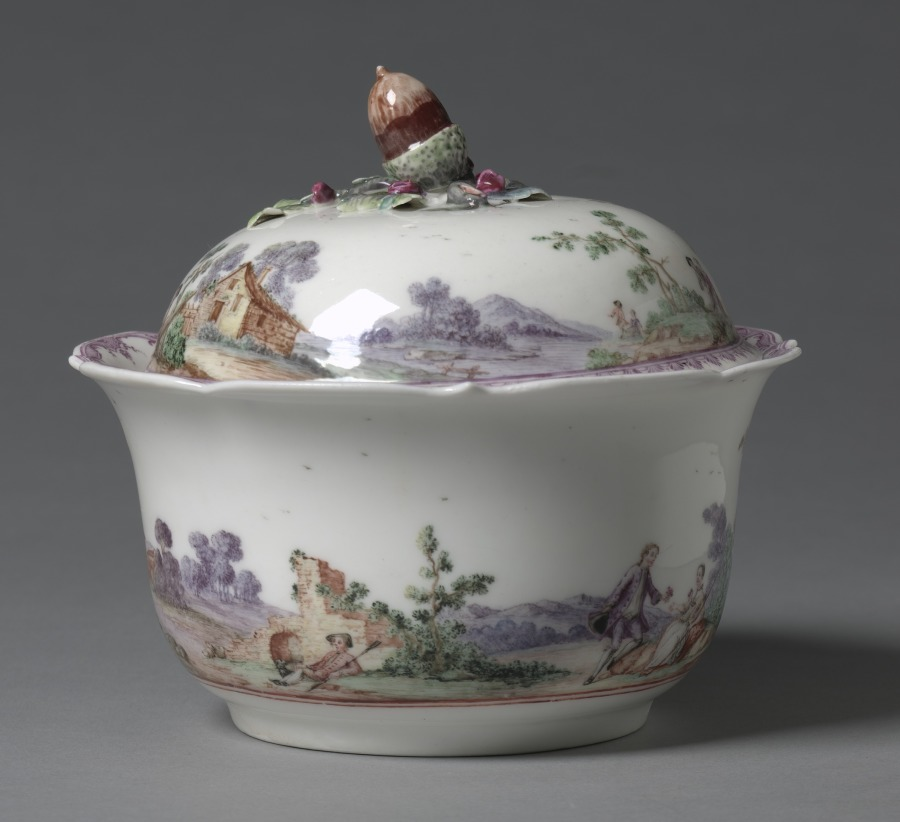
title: Covered Sugar Bowl (Pot à sucre)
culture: France, Vincennes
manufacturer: Vincennes Porcelain Manufactory (French, 1740–1756)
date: 1745–48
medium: soft-paste porcelain with enamel decoration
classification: Ceramic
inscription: In red on bottom of bowl: P.M. In red on interior of lid: P.M. 16 4.8B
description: This covered bowl, likely intended for sugar, is one of the earliest surviving examples of Vincennes porcelain, a reputed French factory moved to Sèvres in 1756. The continuous landscape is painted on this object en pointillé, a method by which a painter forms images with tiny dots. This style may have been influenced by their German competitors at the Meissen Porcelain Factory.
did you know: Three separate shades of purple, one of the most expensive colors to produce on porcelain during this time, are used extensively in this object’s paintings.